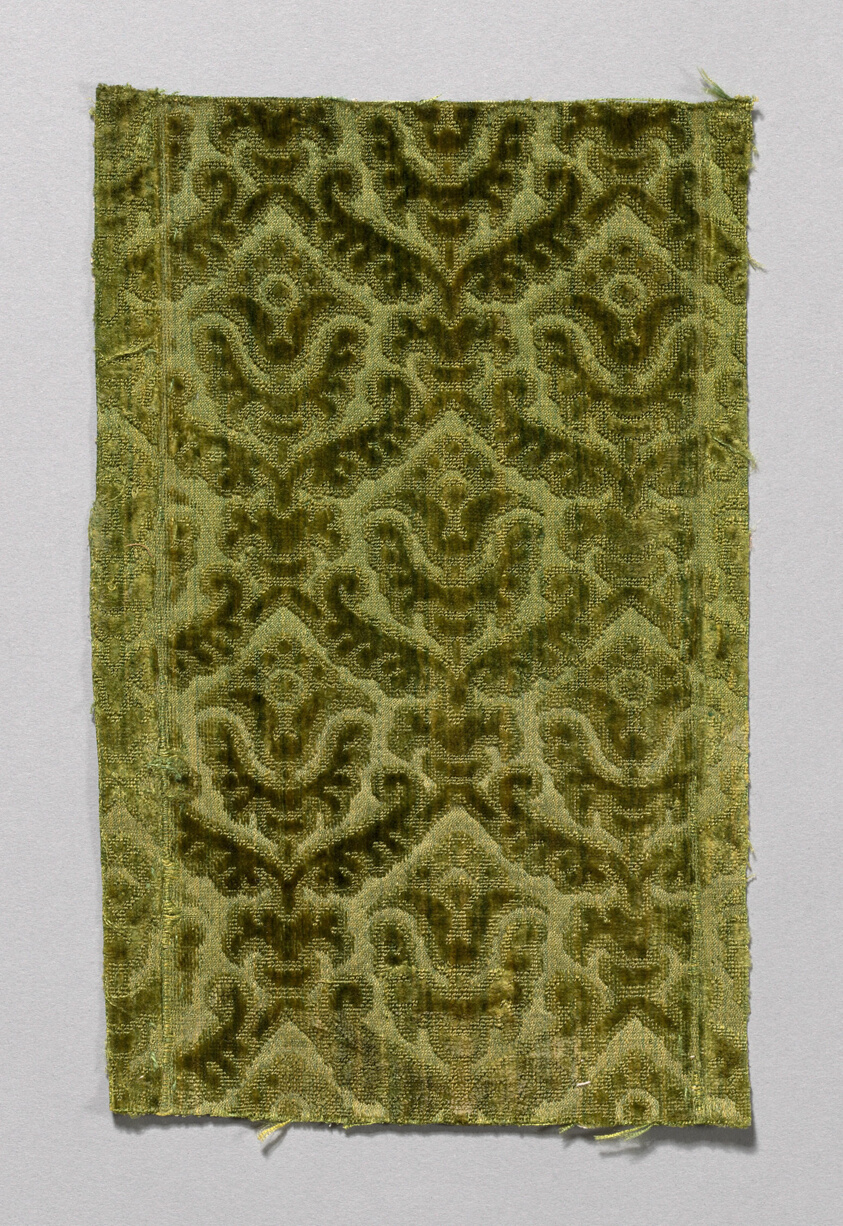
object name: Textile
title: Fragment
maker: Italy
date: 1600/50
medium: Silk, velvet; cut, uncut, voided; satin weave foundation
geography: Italy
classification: textile; weaving - velvet; weaving